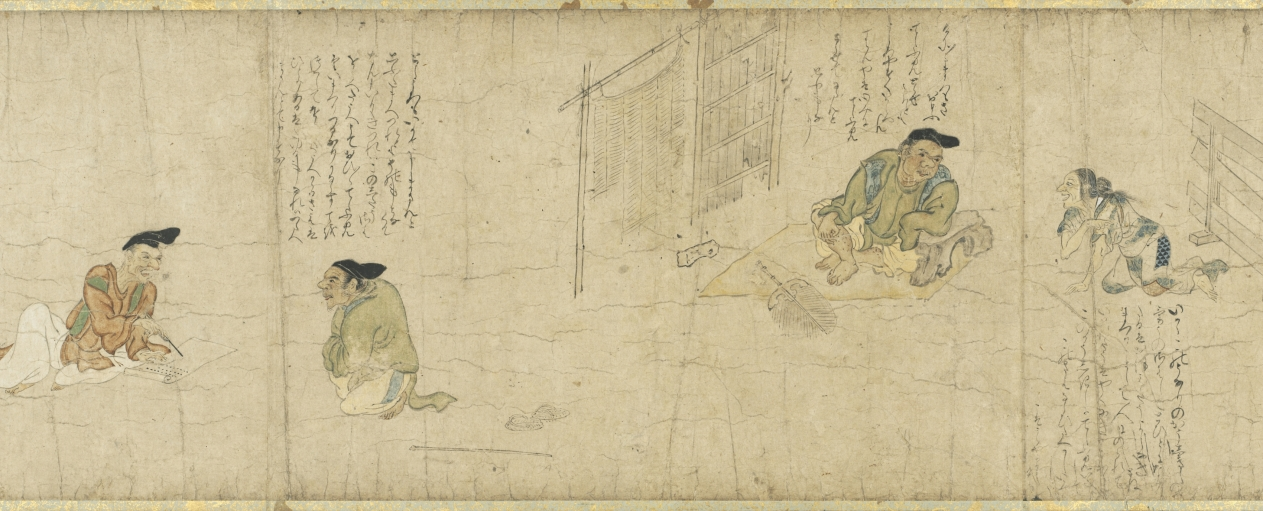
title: The Story of Fukutomi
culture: Japan, Muromachi period (1392–1573)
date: mid-1400s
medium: Handscroll; ink and color on paper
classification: Painting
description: This handscroll shows the second half of an odd tale in which a ne’er-do-well seeks the path to quick fortune and learns the art of musical flatulence. Prior to a major performance, a mentor (and competitor) advises him to consume morning glory seeds, a laxative. Thus, while performing he fouls himself and ends his days in humiliation. The audacious nature of this story and its presentation—well-animated figures with dialogue adjacent to the appropriate moments of action—create a primitive graphic novel. Japanese visual humor about farting preceded this story, but the satirical, mean-spirited twist in this tale suggests its intent was not merely to be humorous. The story was likely commissioned by court officials who disapproved of common performers rising to high positions, outflanking what was the accepted social order.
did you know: This scroll is treasured as the second oldest surviving version of this story.